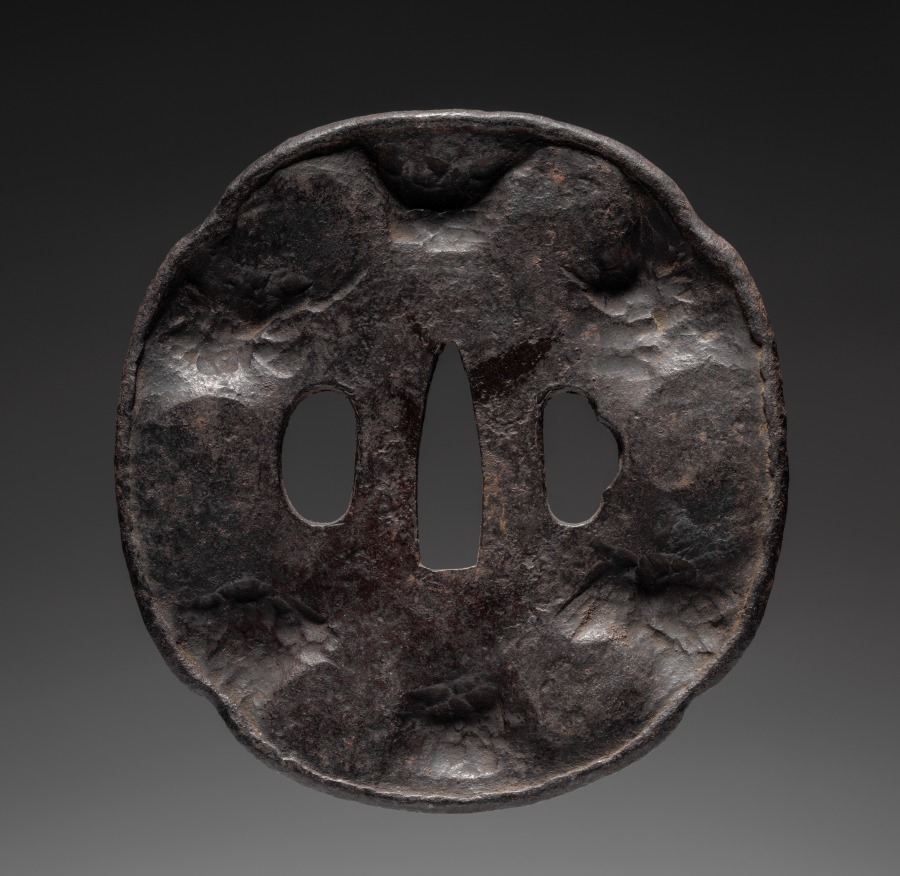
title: Sword Guard (Tsuba)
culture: Japan, possibly Edo period (1615-1868)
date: c. 1615–1868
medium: iron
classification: Arms and Armor